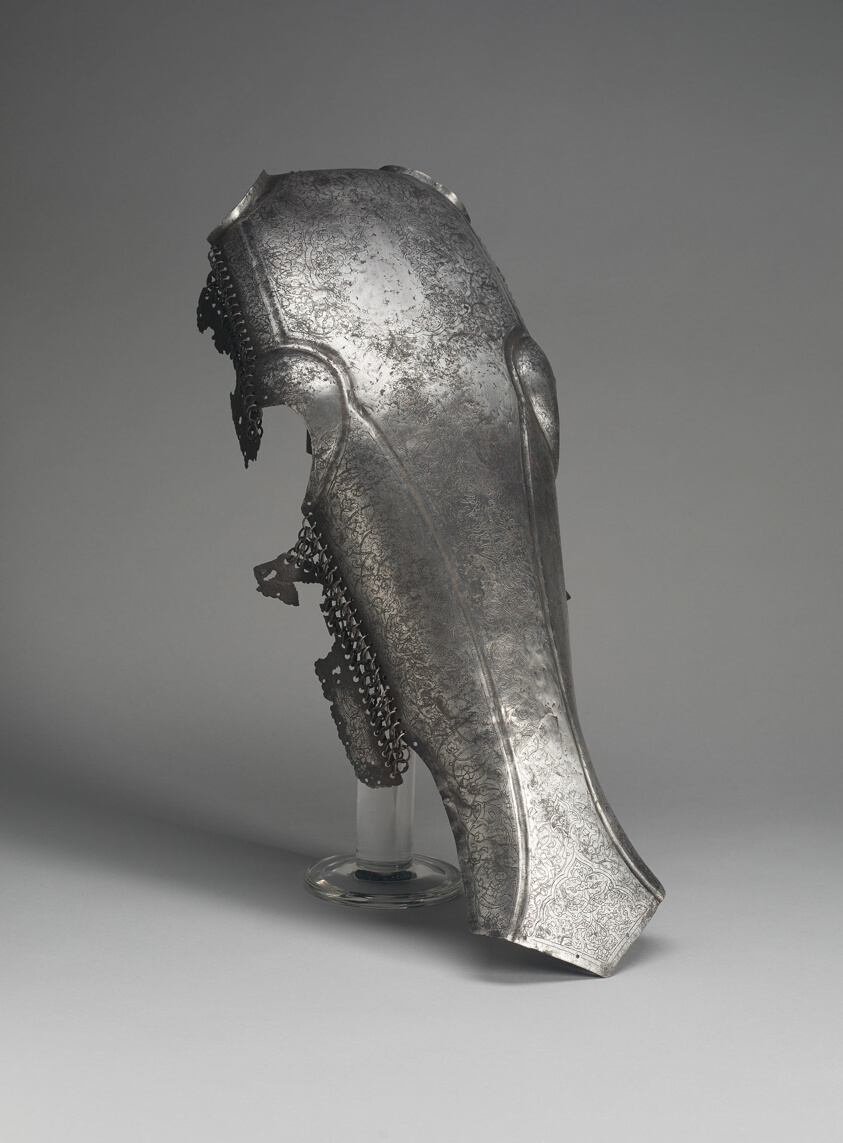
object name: Armor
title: Shaffron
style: Islamic, ottoman, turkish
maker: Ottoman, Turkish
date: 16th century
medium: Steel and iron wire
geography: Turkey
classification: horse equipment; islamic; armor; arms and armor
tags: Óttoman, islamic